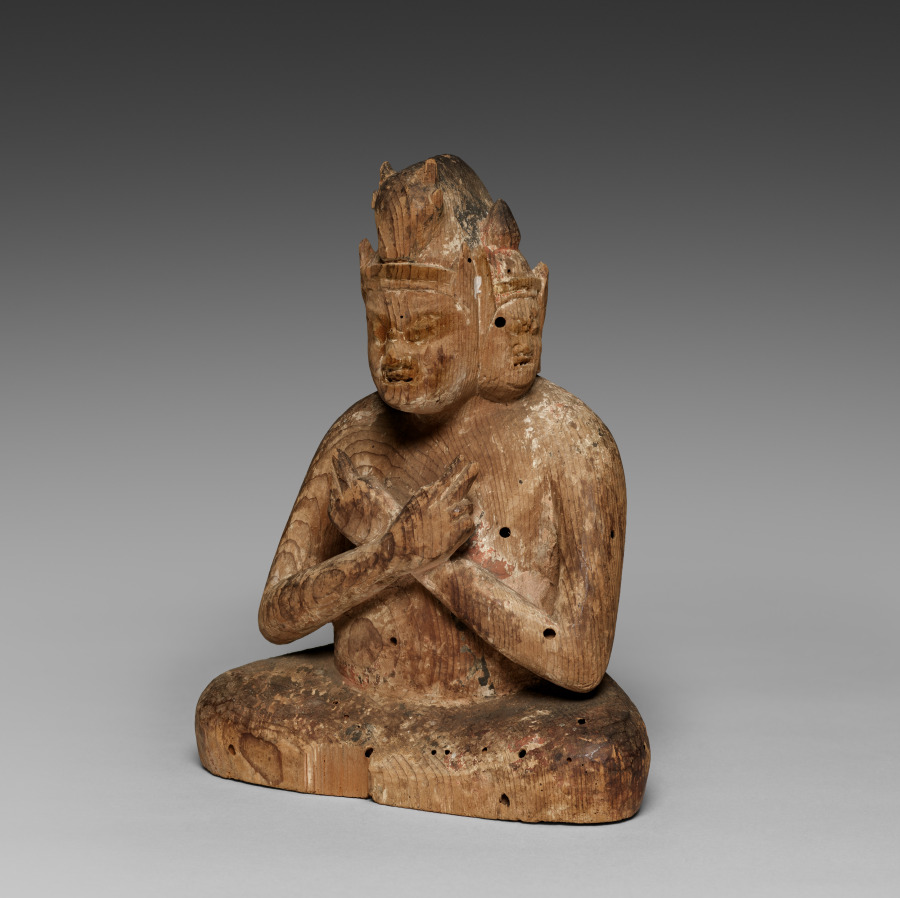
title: Gozu Tennō (Ox-Headed Plague Deity)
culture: Japan, Heian period (794–1185)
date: 1100s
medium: Wood with traces of color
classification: Sculpture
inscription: Object has wood storage box made and inscribed by former owner, sculptor Hirakushi Denchū (1872–1979). Inscription on face of box lid reads: Gozu Tennō sonzō (sculpture of Gozu Tennō [Ox-Headed Deity of Plague] 牛頭天王尊像); inscription on inside of box lid reads: made in the latter part of the Heian period, respectfully inscribed by Hirakushi Denchū [age] 99, February 1970 (平安朝後期作昭和四十五年二月 九十九 平櫛田中 拝題）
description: Gozu Tennō is a deity who is capable of both bringing epidemics and dispelling them. His name is literally “Ox-Headed Celestial King.” He usually has three heads with an ox-head rising above his primary face. He sometimes holds a lasso and sword or an ax, but here holds his hands in a powerful gesture that may be designed to repel illness or promote healing.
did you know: The Gion Festival in Kyoto is related to belief in Gozu Tennō.